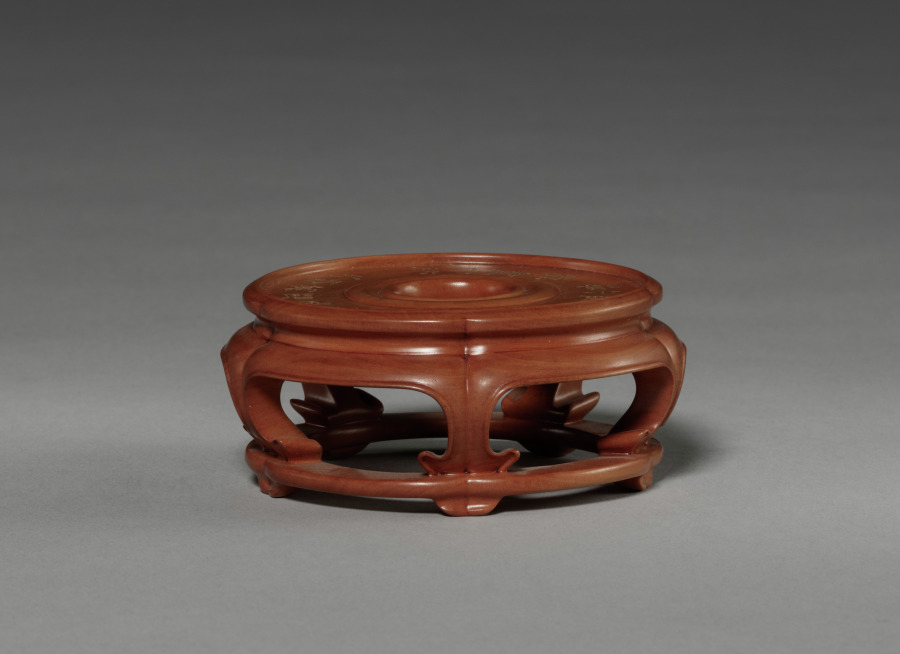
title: Covered Jar (stand)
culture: China, Jiangxi province, Jingdezhen kilns, Ming dynasty (1368-1644), Wanli reign (1573-1620)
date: 1573–1620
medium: porcelain with blue underglaze decoration and overglaze enamels in red, green, and yellow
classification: Wood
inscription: Six character "nien hao" enclosed by double ring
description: In the Ming (1368–1644) and Qing (1644–1911) dynasties, luxury items became more affordable to larger parts of the society, including women, merchants, and literati in non-official positions. Imperial patronage and a growing urban population encouraged consumption of luxury goods and local craftmanship. This covered porcelain jar has blue underglaze and overglaze in red, green and blue enamels. It shows Ming dynasty advancements in porcelain decoration and the creative mind of the talented artisans who made it.